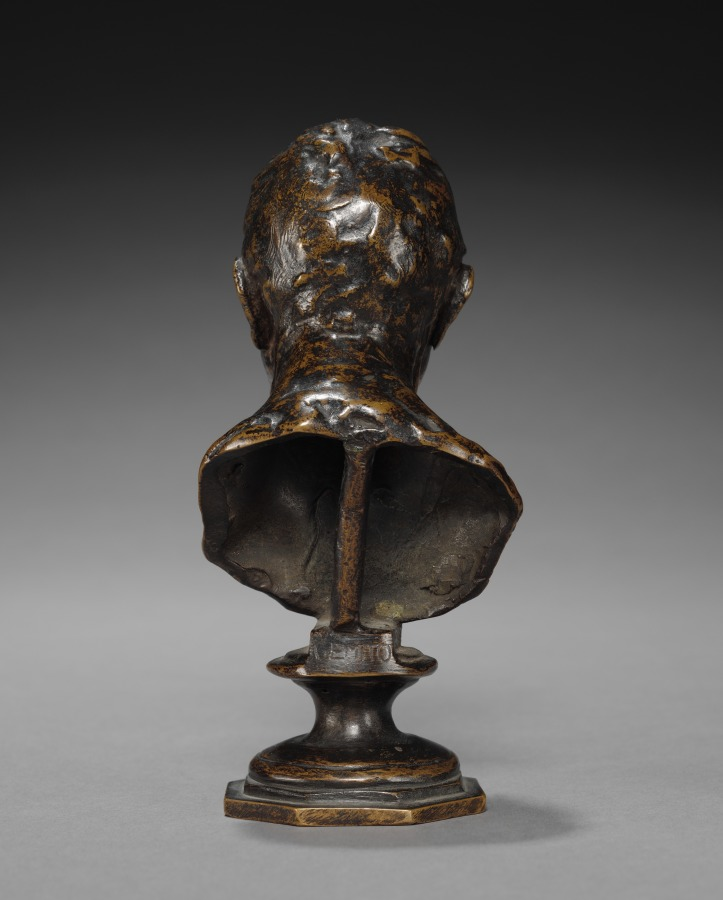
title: Head of a Man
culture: Italy, late 19th-early 20th century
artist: Vincenzo Gemito (Italian, 1852–1929)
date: c. 1875 – 1929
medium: bronze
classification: Sculpture